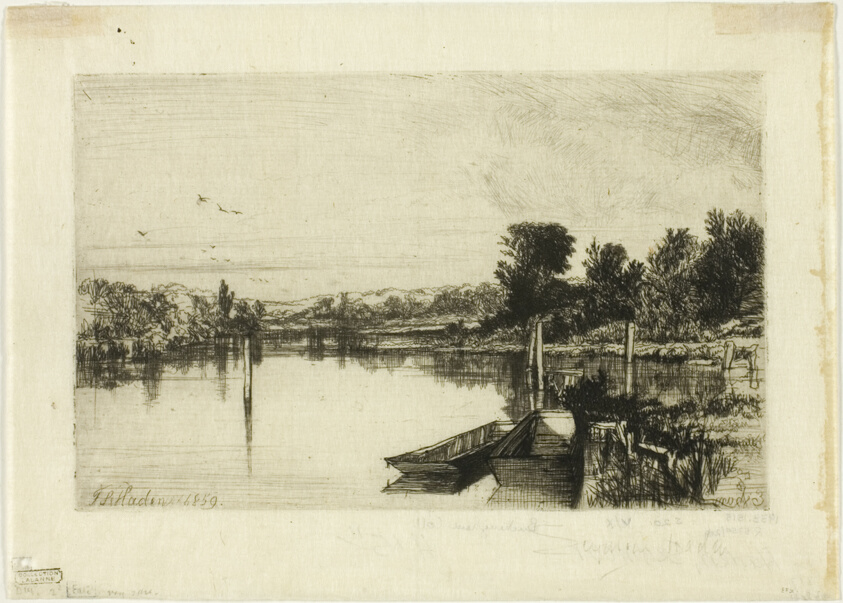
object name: Print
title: Egham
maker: Francis Seymour Haden (English, 1818-1910)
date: 1859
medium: Etching and drypoint on ivory Japanese paper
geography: England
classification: etching; print; prints and drawing